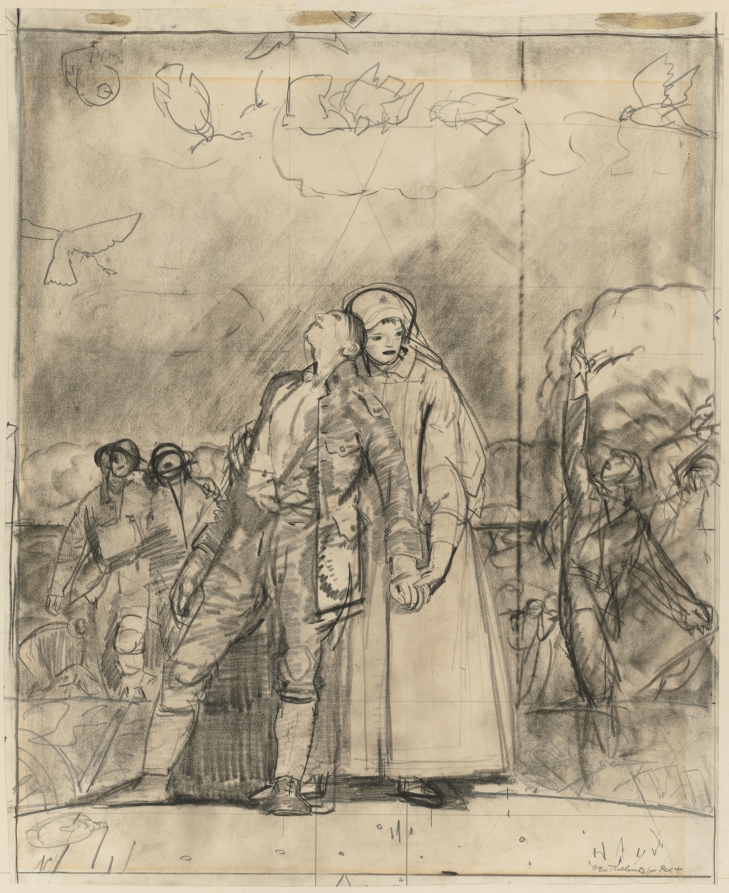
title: The Eve of Victory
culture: America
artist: George Bellows (American, 1882–1925)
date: 1918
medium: charcoal and graphite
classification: Drawing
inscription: Signed in pencil, lower right corner: "Geo. Bellows for Red"